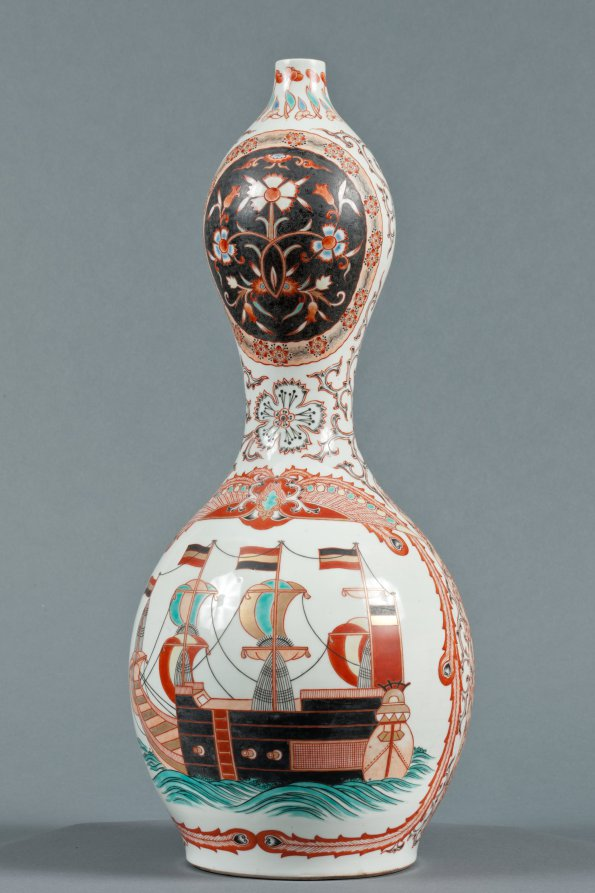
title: Bottle with Western Ships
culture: Japan, Edo period (1615–1868)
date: c. 1800–1868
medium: Porcelain with decoration in colored enamels and underglaze blue, overglaze enamels, and gold (Hizen ware, Arita type)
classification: Ceramic